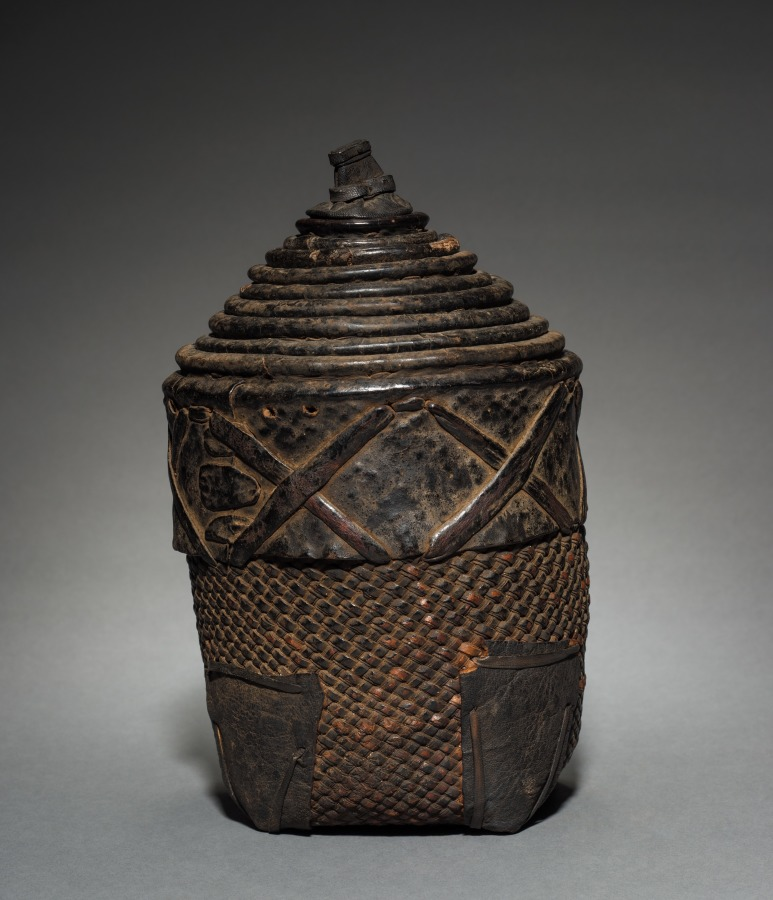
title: Set of Nesting Wedding Baskets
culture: Africa, Western Sudan, Burkina Faso, Lobi, 20th century (?)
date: c. 1900s ?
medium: Plant fiber and leather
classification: Vessels